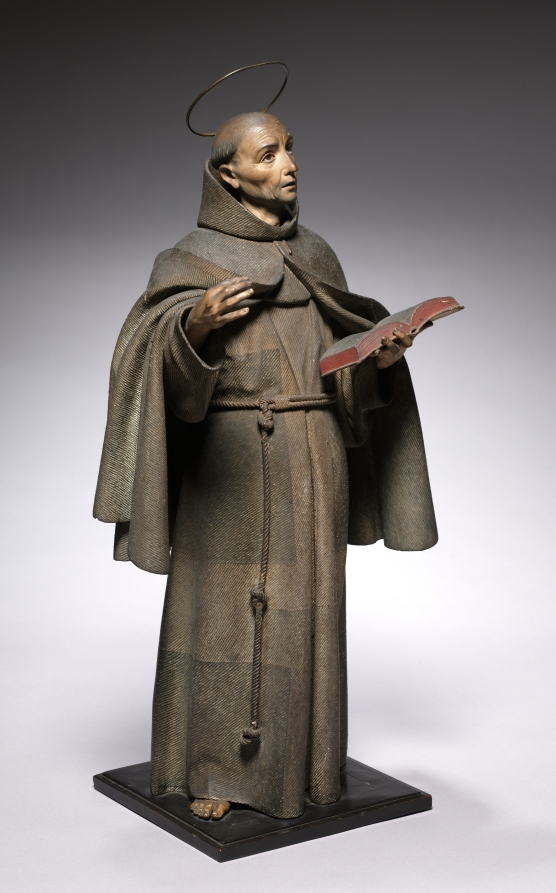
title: Saint Peter of Alcántara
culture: Spain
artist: Pedro de Mena (Spanish, 1628–1688)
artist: and Workshop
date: c. 1663–70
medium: painted wood, with ivory and glass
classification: Sculpture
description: Painted wood sculpture from Spain in the 1600s involved a team of artisans working under a lead sculptor. The sculptor first carved numerous pieces of wood in complex forms. So the paint would stick properly, these fragments were delicately covered in gesso (a combination of white chalk and glue made from animal collagen), preserving the subtle woodcarving underneath. The rough surface of the saint's face—reflecting his age and hardships—came from texturing the gesso with a brush. The glass eyes, probably imported from Venice, were inserted from behind the face before the wood pieces were attached. Finally, the eyelashes were added for a further touch of realism. A painter created the appearance of coarse sackcloth in a distinctive style, with yellow strokes rising off the surface. Smoother brushstrokes form the flesh tones, even revealing the saint's five-o'clock shadow. Unlike other kinds of painting, sculpture from southern Spain at this time was usually not covered in varnish; sculptors prized the unvarnished paint for its realistic effect, although it makes the surface exceptionally delicate and susceptible to dust and dirt, which more easily sticks to the surface.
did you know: Peter of Alcantara was so dedicated to his work he slept only 90 minutes a night--he's the patron saint of night watchmen!